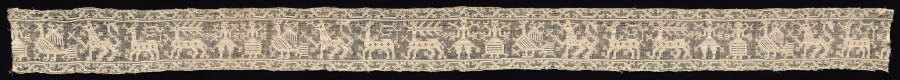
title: Band with Parade of Human Figures, Stags, and Other Fantastic Animals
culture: Italy, Sicily ?, 1500s-1600s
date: 1500s-1600s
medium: Bleached linen (est.): needle lace, burato (twined ground and darned in one direction)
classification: Lace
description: Animals viewed in profile, some with their legs raised, indicate movement, such as a parade or procession. However, the human figures are shown frontally. Linear elements protruding from their backs and hands held out and open suggest the figures may be angels modeling a gesture of prayer.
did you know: Myrta Leonora Jones, the donor of this lace, was a women’s rights activist in Cleveland in the early 1900s.